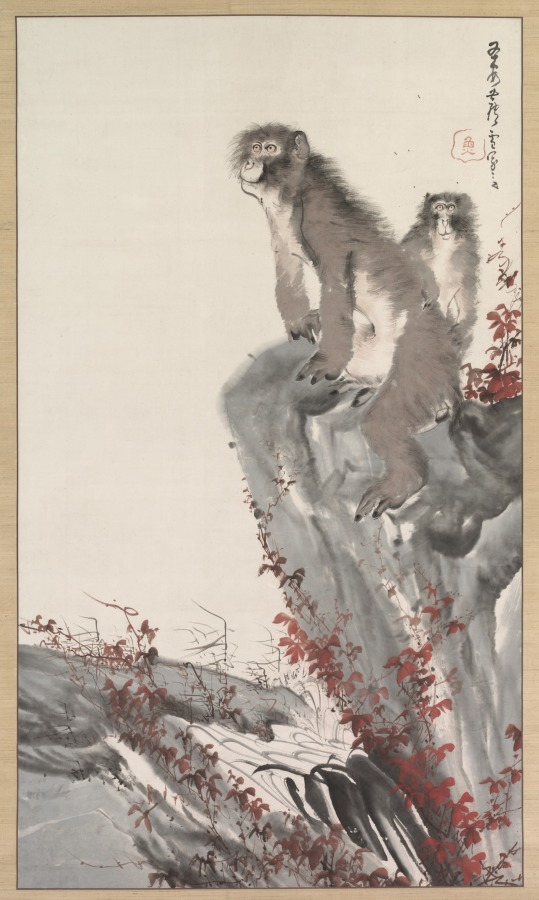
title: Monkeys by a Stream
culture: Japan, Edo period (1615–1868)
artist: Nagasawa Rosetsu (Japanese, 1754–1799)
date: c. 1796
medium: hanging scroll; ink and color on paper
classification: Painting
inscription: Inscription: 平安蘆雪寫意; Transliteration: Heian Rosetsu shai; Sealed: 魚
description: The two monkeys in this painting are Japanese macaques. The one in front dangles its left leg over a sharply angled rock, surveying the land beyond a fast-moving mountain stream. A smaller monkey sits behind it, looking directly ahead as if it realizes it is being watched. The artist used just a few highly contrasting warm and cool colors, sweeping brushstrokes over ink washes, and loose lines to create a scene that powerfully evokes the mentally engaged state of the two animals.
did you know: Monkeys, which are found throughout the mountainous and wooded areas of Japan, became a favorite subject of many later Japanese artists.